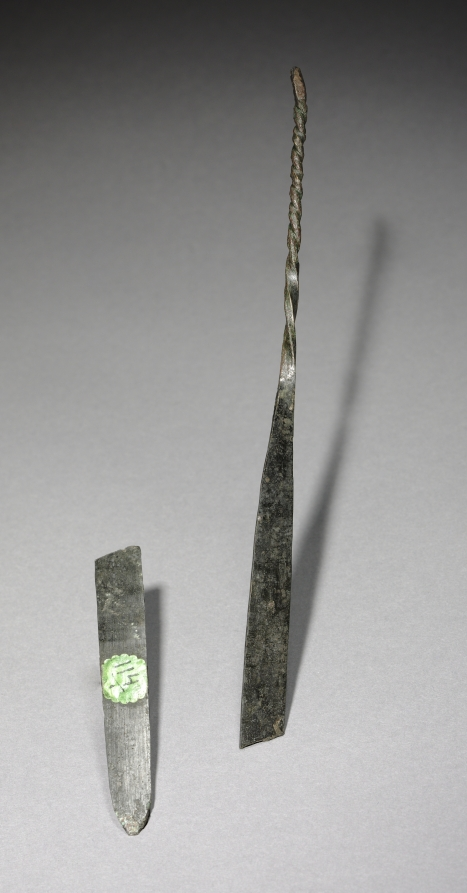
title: Dagger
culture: Korea, Goryeo dynasty (918–1392)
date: 918–1392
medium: bronze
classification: Arms and Armor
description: Metal objects such as this razor were used not only as daily accessories, but also as burial goods for commemorating the dead.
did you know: This razor was used for tonsure, a practice of shaving a monk's hair.